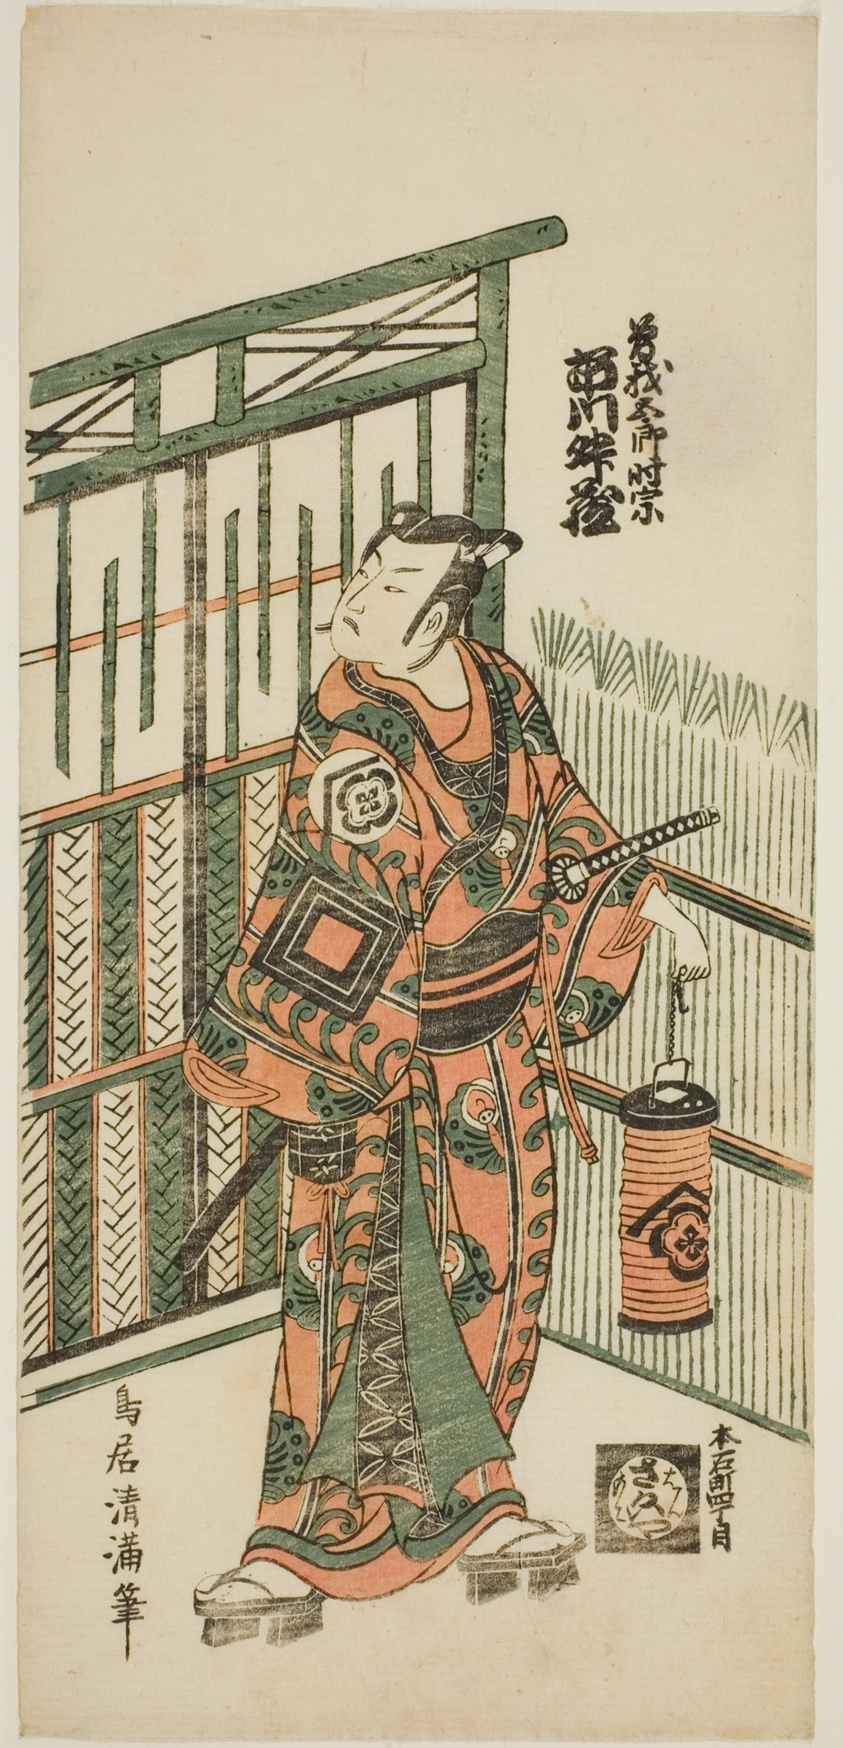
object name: Print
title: The Actor Ichikawa Masuzo I as Soga no Goro in the play "Tokitsukaze Irifune Soga," performed at the Nakamura Theater in the first month, 1758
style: Japanese (culture or style)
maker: Torii Kiyomitsu I (Japanese, 1735–1785)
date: 1758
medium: Color woodblock print; hosoban, benizuri-e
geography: Japan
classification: woodblock print; print; asian art